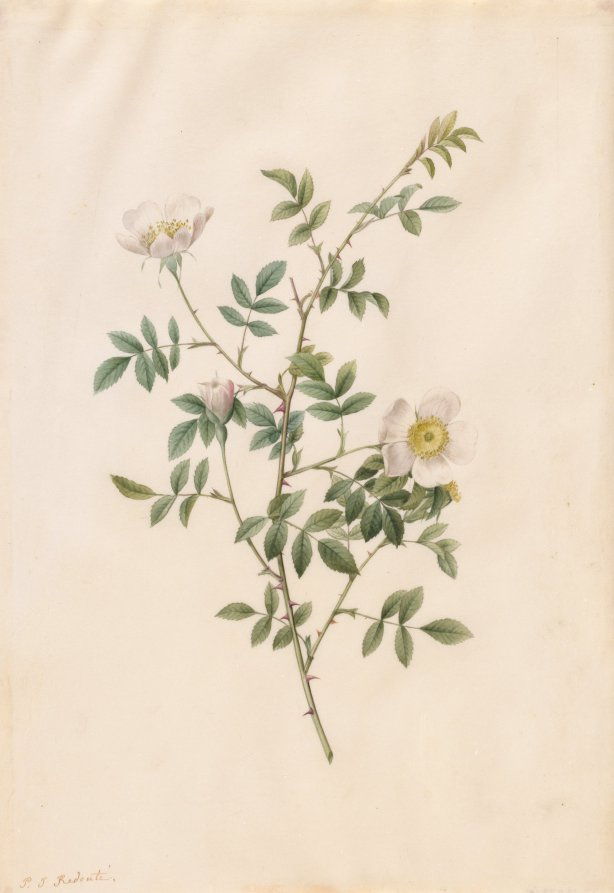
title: Brier Bush Rose or Dog Rose (Rosa Sepium Rosea)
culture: France, 19th century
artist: Pierre-Joseph Redouté (French, 1759–1840)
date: 1817–24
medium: watercolor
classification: Drawing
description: Les Roses was commissioned by the empress Josephine who, after marrying Napoleon Bonaparte in 1795, rebuilt the royal country estate Malmaison and its opulent gardens. An immense hothouse was constructed to shelter her magnificent collection of rare and exotic plants, which included 250 varieties of roses.